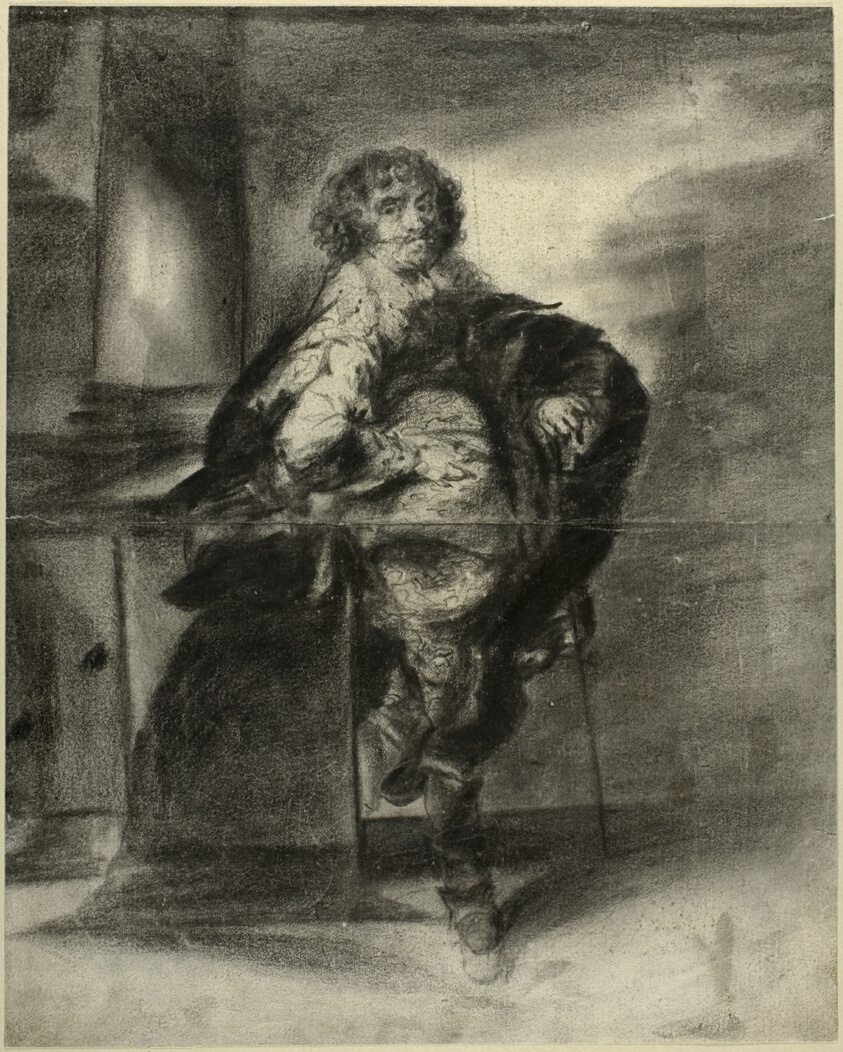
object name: Drawing and Watercolor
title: A Man in 17th Century Costume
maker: Unknown artist; English, late 18th-early 19th century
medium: Black chalk and charcoal, with stumping, on ivory laid paper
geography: England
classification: chalk; drawings (visual works); prints and drawing